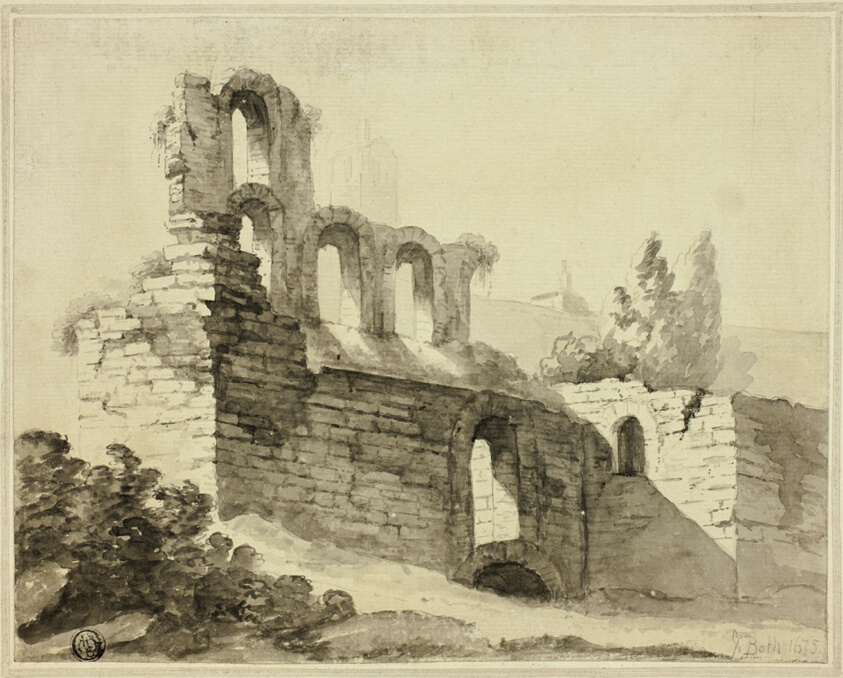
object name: Drawing and Watercolor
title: Ruin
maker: Follower of Jan Both (Dutch, c. 1618-1652)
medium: Pen and gray ink, and brush and gray wash, over traces of graphite on ivory laid paper, laid down on card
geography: Holland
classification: ink or chalk wash; drawings (visual works); prints and drawing